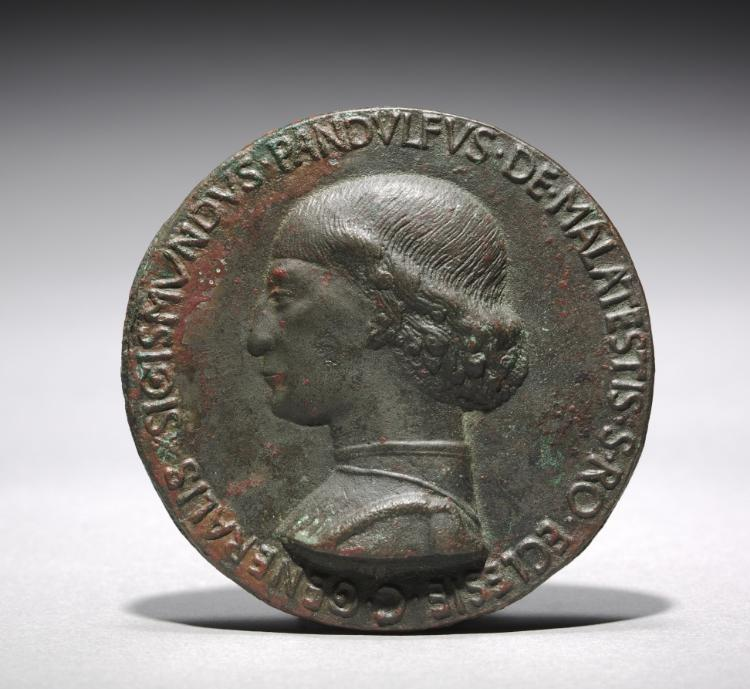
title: Portrait of Sigismondo Pandolfo Malatesta, Lord of Rimini and Fano (obverse)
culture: Italy, 15th century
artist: Matteo de' Pasti (Italian, 1420–1467/68)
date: 1446 or later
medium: bronze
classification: Sculpture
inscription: located along the circumference: SIGISMVNDVS PANDVFVS DE MALATESTIS S(anctae) RO(manae) ECLESIE C(apitaneus) GENERALIS.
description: Malatesta was both a ruthless military leader and a man of considerable learning and culture. His medals, largely used for propoganda purposes, are among the earliest examples of the medium and speak to the innovations in the classical tradition that he fostered in Rimini. The original model dates to 1446, but this cast probably dates to the late 19th or early 20th century.